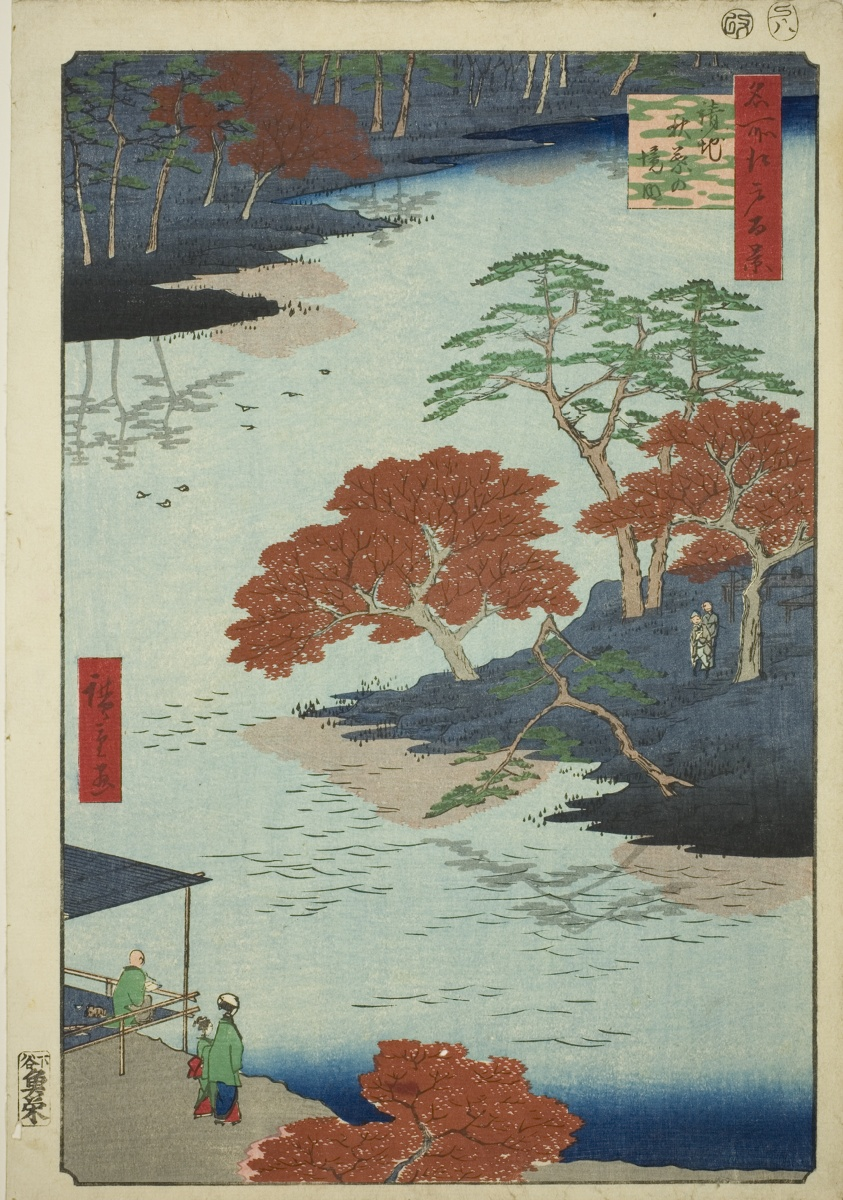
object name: Print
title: Precints of the Akiba Shrine, Ukeji (Ukeji Akiba no keidai), from the series "One Hundred Famous Views of Edo (Meisho Edo hyakkei)"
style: Japanese (culture or style)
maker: Utagawa Hiroshige 歌川 広重; Japanese, 1797-1858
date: 1857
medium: Color woodblock print; oban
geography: Japan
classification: woodblock print; print; asian art